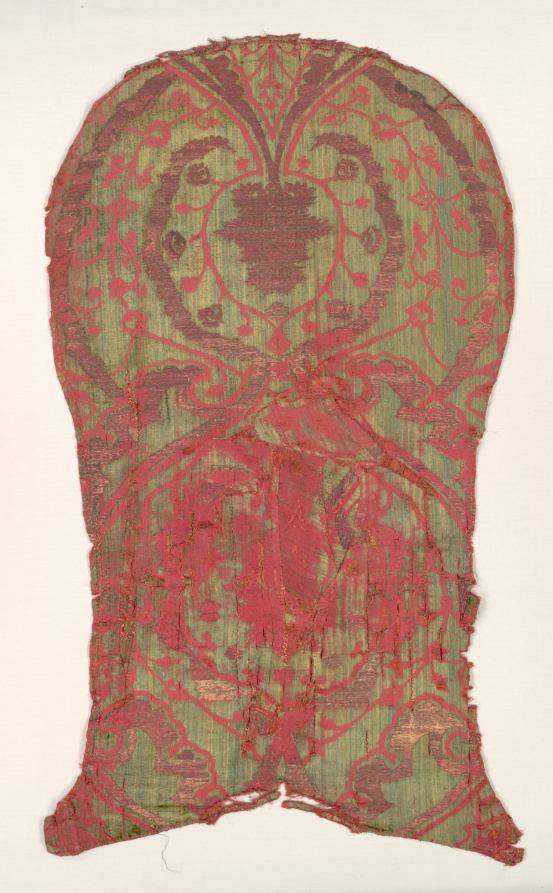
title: Chasuble Front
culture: Turkey, 16th century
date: 16th century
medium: velvet; silk and metallic thread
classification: Velvet